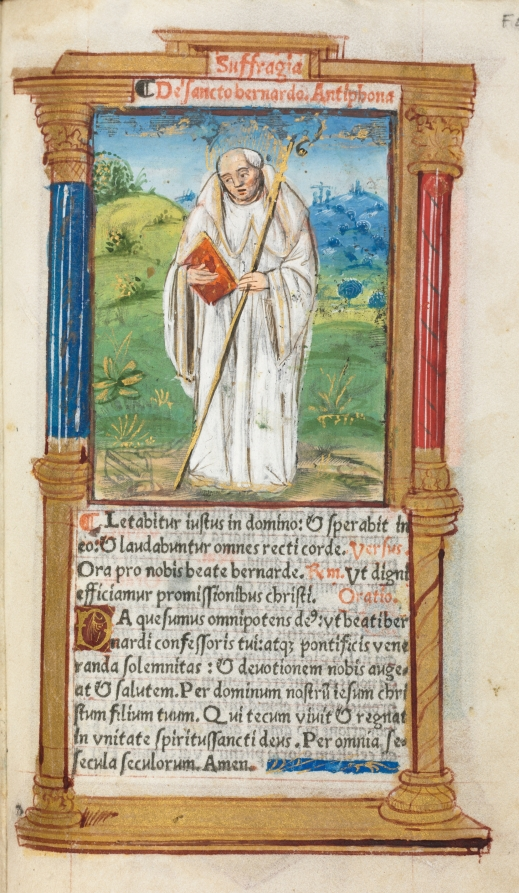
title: Printed Book of Hours (Use of Rome): fol. 108r, St. Bernard of Clairvaulx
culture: France, Paris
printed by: Guillaume Le Rouge (French, Paris, active 1493–1517)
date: 1510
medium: 112 Printed folios on parchment, bound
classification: Bound Volume